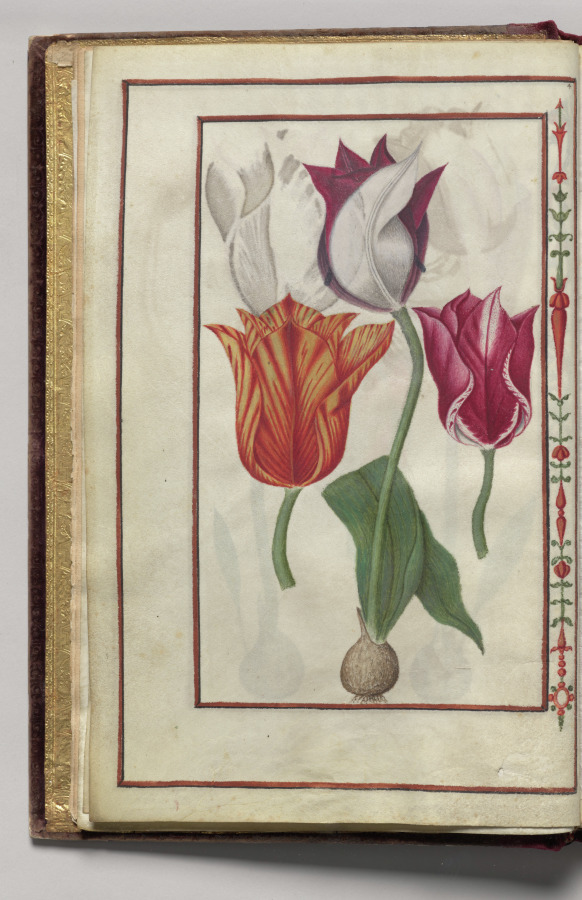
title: Tulips, folio 2 (verso), from Florilegium (A Book of Flower Studies)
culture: France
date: 1608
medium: watercolor, ink, silver, and gold over occasional traces of pencil, on vellum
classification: Bound Volume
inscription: Dated: Poitiers 1608 (on frontispiece) Signed: On frontispiece in black ink, lower right: Van Kuyk Notation on drawing: Frontispiece: in pencil, lower margin: * élève de Van Kessel, peintre flammand (* in pencil also appears in front of Van Kuyk's name).